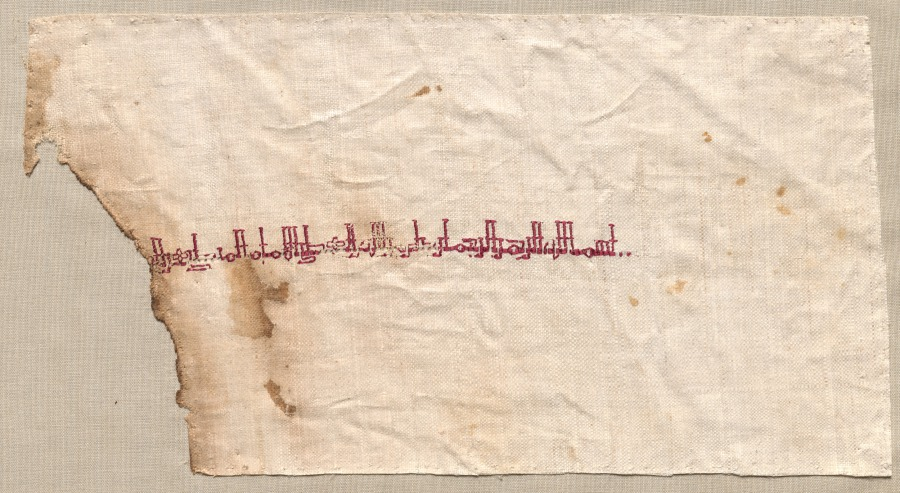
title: Fragment of a Tiraz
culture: Egypt, Ikhshidid period, Caliphate of al-Muti, AH 334-358 (A.D. 946-969)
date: 946–69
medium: silk embroidery on linen tabby ground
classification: Embroidery